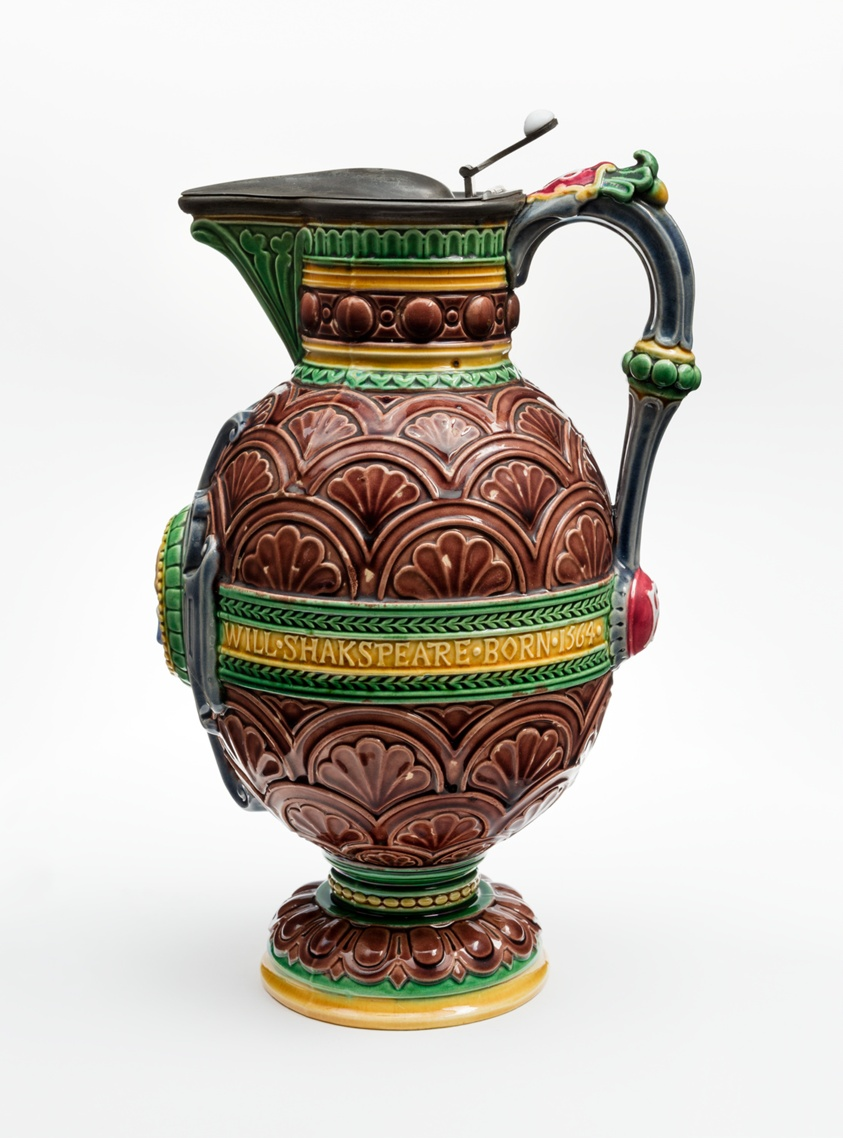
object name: Ceramics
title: Shakespeare Ewer and Basin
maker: Minton Pottery and Porcelain Factory; Stoke-on-Trent, England, founded 1793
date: Ewer: 1873, Basin: 1871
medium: Tin glazed earthenware with pewter mounts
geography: England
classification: ceramics